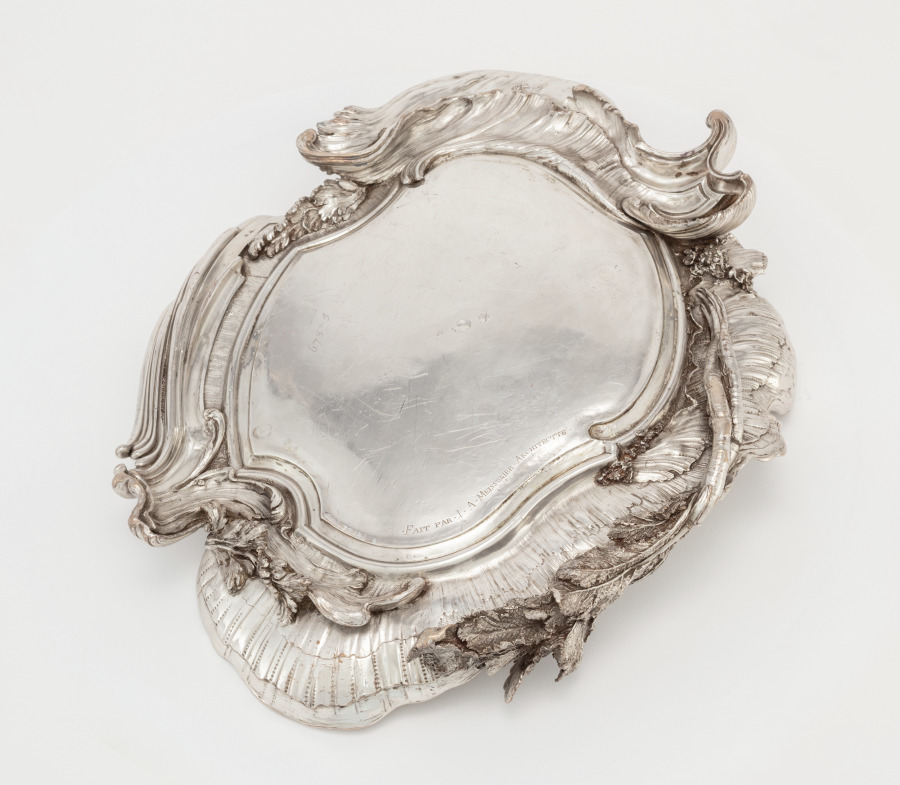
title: Stand for a Covered Tureen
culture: France, Paris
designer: Juste-Aurèle Meissonnier (French, 1695–1750)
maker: Pierre-François Bonnestrenne (French)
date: 1735–38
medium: silver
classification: Silver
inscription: engraved Meissonnier signature.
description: See entry for cover record 1977.182.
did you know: The langoustine, pigeon, and vegetables were cast using real examples giving the silver copies lifelike detail and appearance.